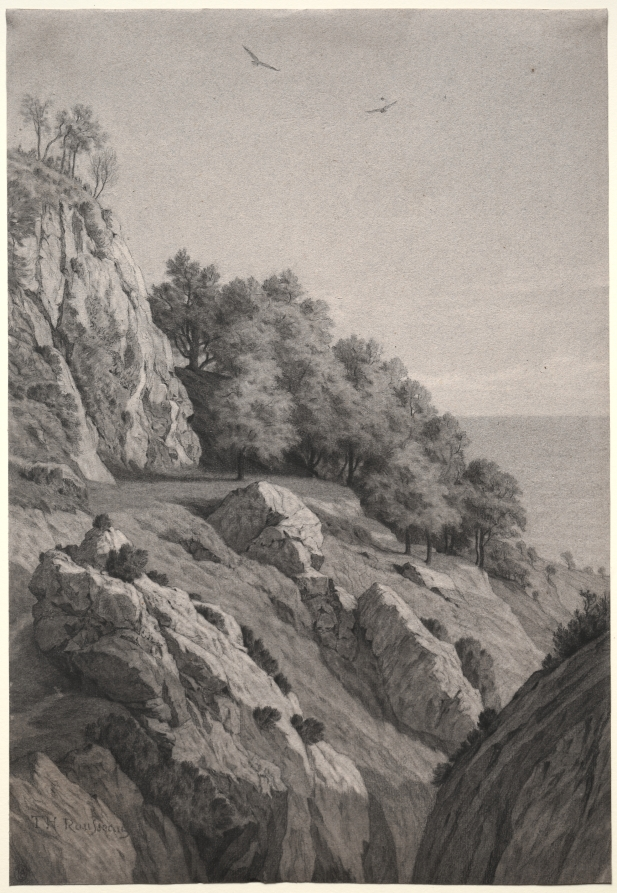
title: Rocky Cliff on a Coast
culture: France, 19th century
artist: Anonymous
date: c. 1850–1860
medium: black chalk (stumped)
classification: Drawing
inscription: signed, lower left, in black chalk: TH. Rousseau (despite signature, it is not by Rousseau)